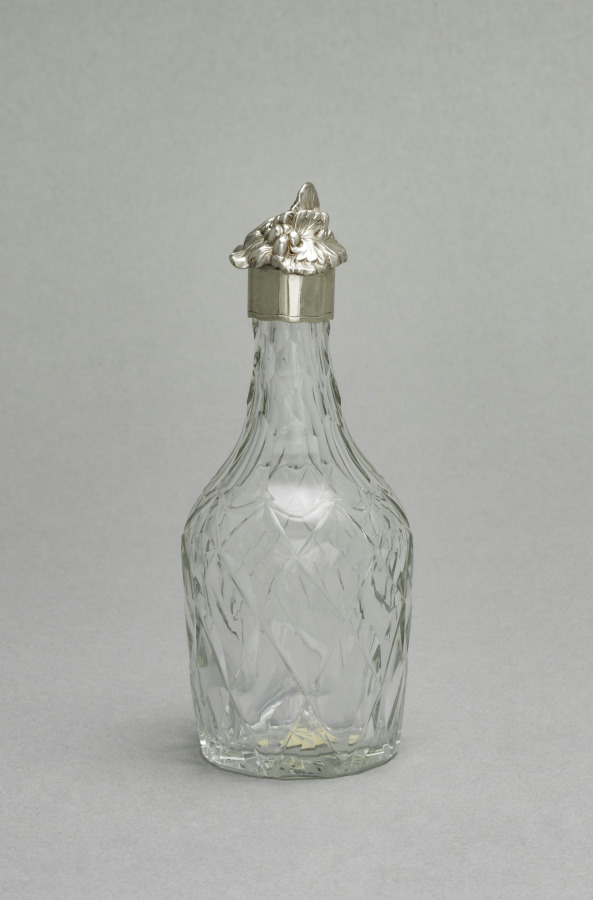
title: Cruet Stand (Bottle)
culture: France, bottle and cover old, but probably not original, 18th Century(?)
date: 1700s(?)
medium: silver and glass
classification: Metalwork